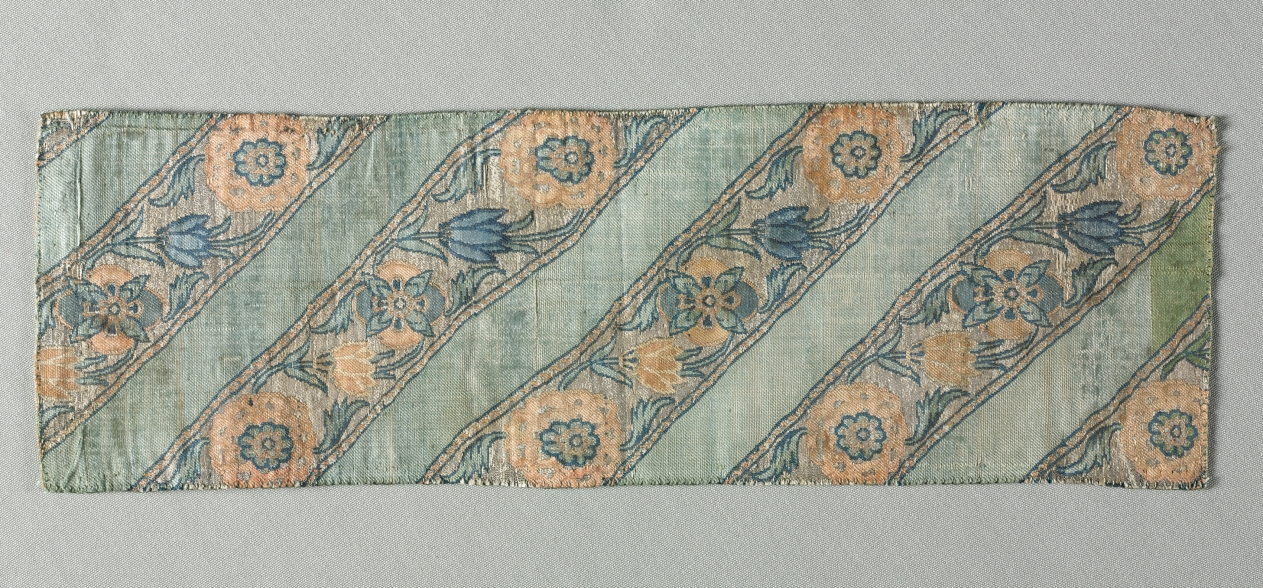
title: Fragment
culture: Iran, 17th century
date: 1600s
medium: brocade; silk and metal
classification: Textile